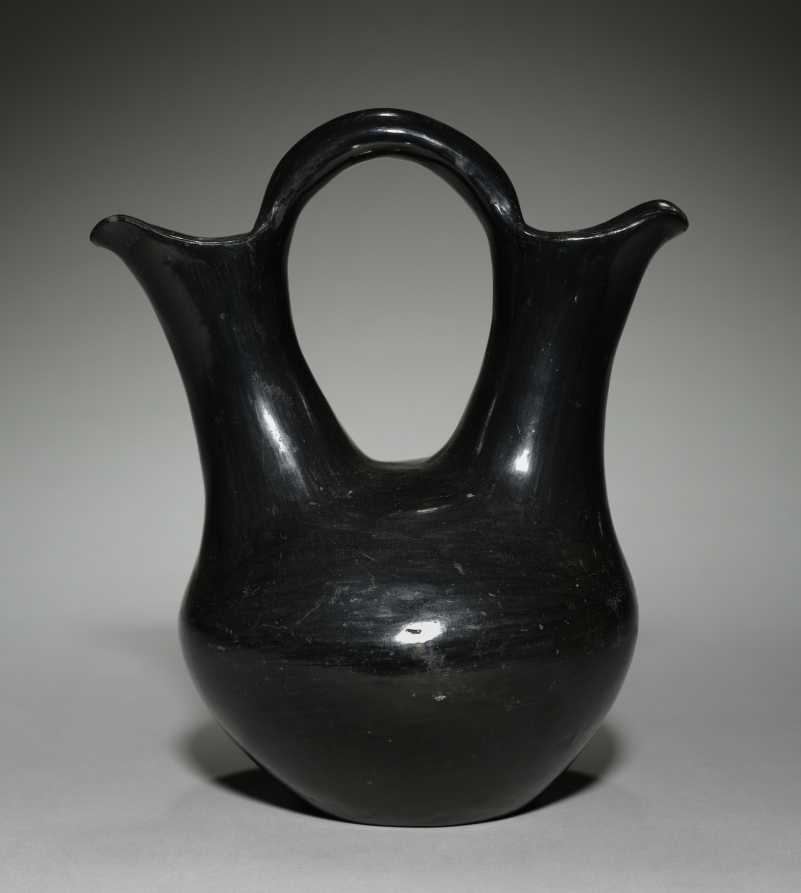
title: Wedding Jar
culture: Southwest, Pueblo, Santa Clara, Post-Contact, 20th century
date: c. 1900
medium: ceramic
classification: Ceramic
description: At Santa Clara Pueblo, the double-spouted wedding jar is made not only to sell but also for use during its namesake ceremony, when the bride and groom drink from opposite spouts. The origin of the unusual form is unclear; once considered a modern innovation, it may instead be an ancient form revived in the late 1800s, perhaps in response to market forces that tourism set in play. This example is made from the black ware for which Santa Clara potters are known.